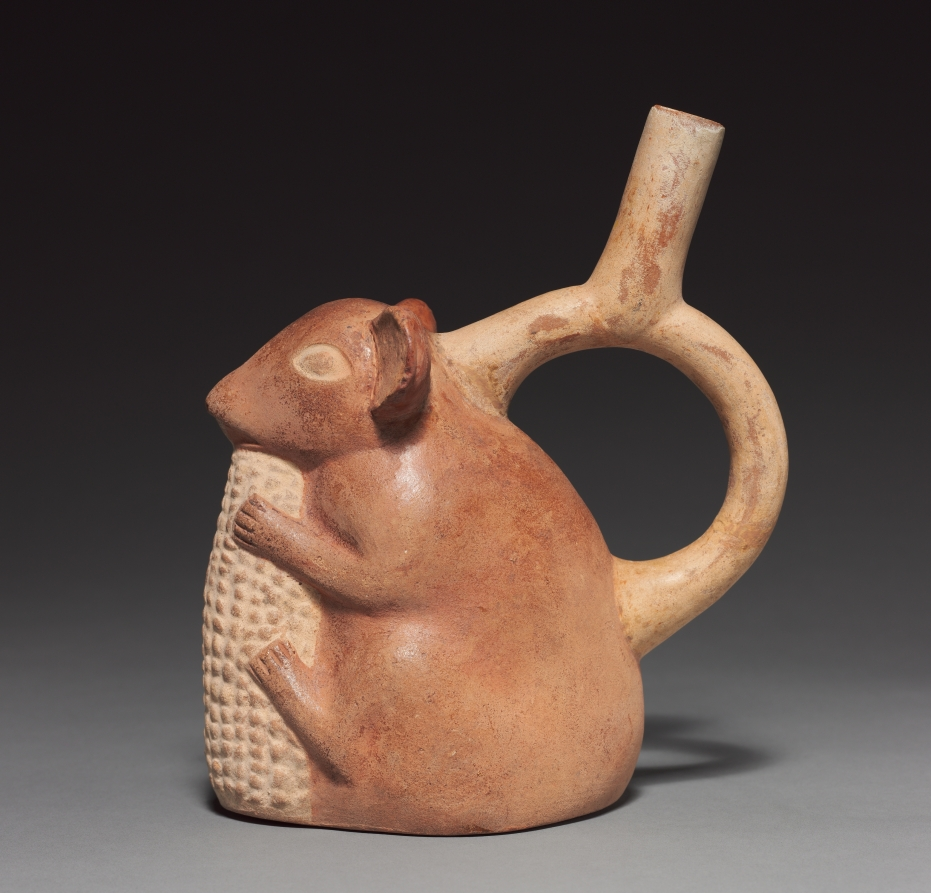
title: Rodent with Corn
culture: Peru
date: 50–800 CE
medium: pottery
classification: Ceramic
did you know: From the Moche, renowned for animal portraits, comes this rodent gnawing maize (corn).